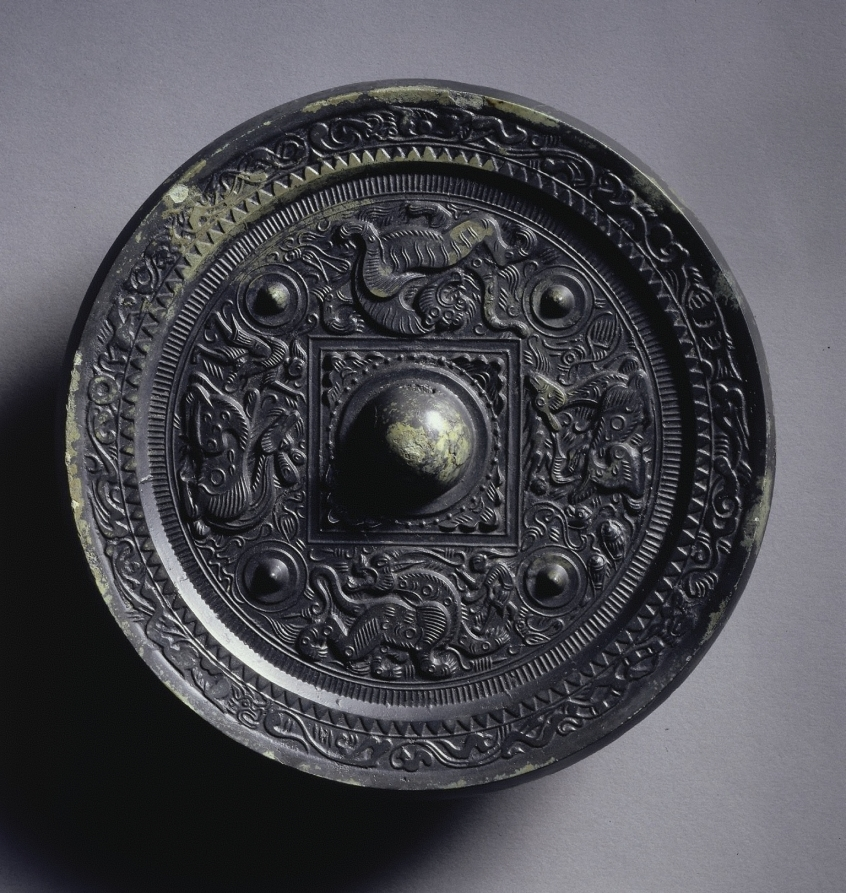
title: Mirror with a Central Square, Immortals, and Auspicious Animals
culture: China, Eastern Han dynasty (25–220 CE)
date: 100s CE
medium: bronze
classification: Metalwork